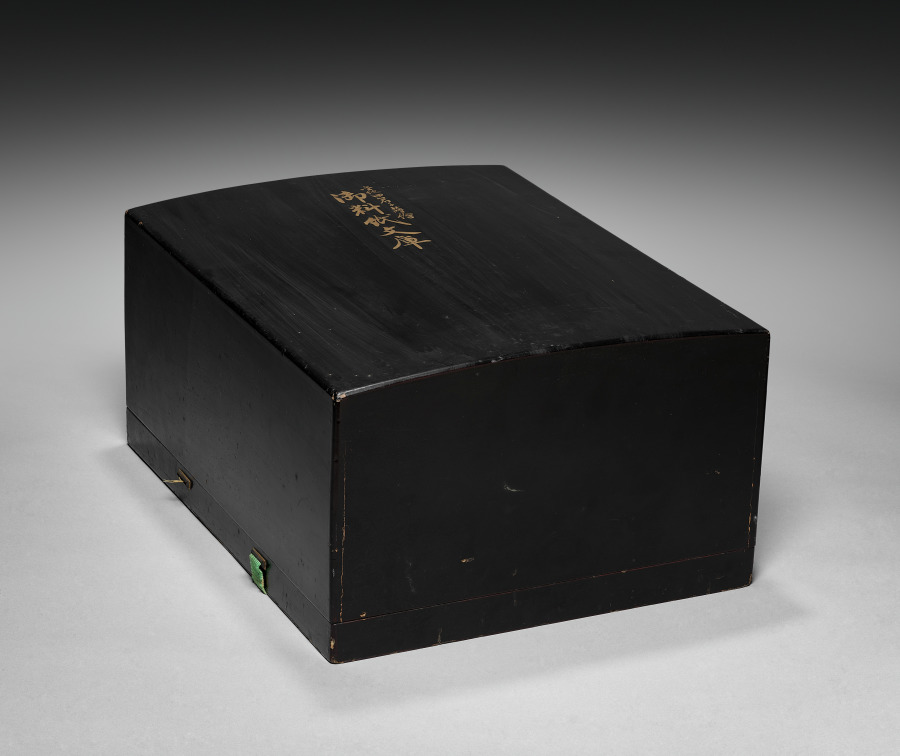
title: Storage Box (Tomobako) for Document Box (Ryōshibako) with Chrysanthemum and Plum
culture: Japan, Meiji period (1868–1912)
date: late 1800s-early 1900s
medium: wood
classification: Lacquer